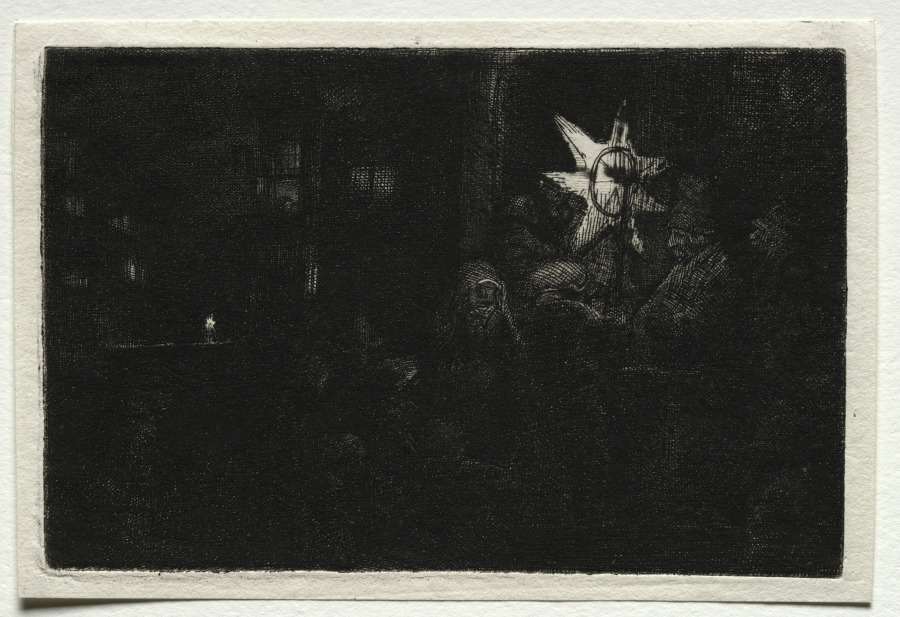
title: The Star of Kings: A Night Piece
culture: Netherlands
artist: Rembrandt van Rijn (Dutch, 1606–1669)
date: c. 1651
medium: etching and drypoint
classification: Print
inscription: VERSO, upper left, in graphite: N° 112 S. Gt. ; lower left, in graphite: f 330.- ; lower left, in graphite: B. 113